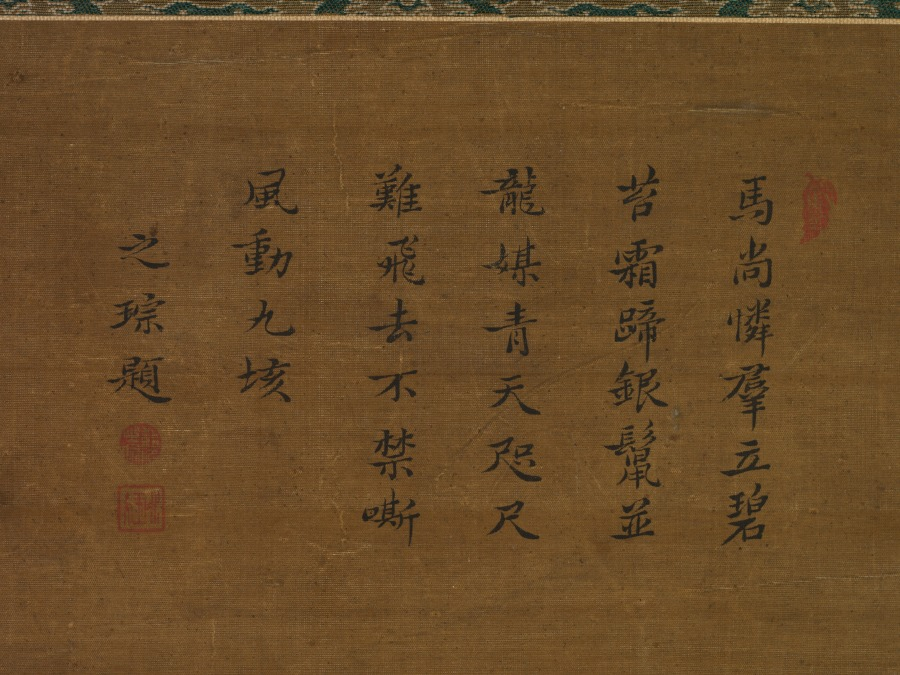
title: Two Horses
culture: China, Qing dynasty (1644-1911)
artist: attributed to Yu Yuan (Chinese, active 1700s)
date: 1644–1911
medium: Hanging scroll; ink and color on silk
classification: Painting